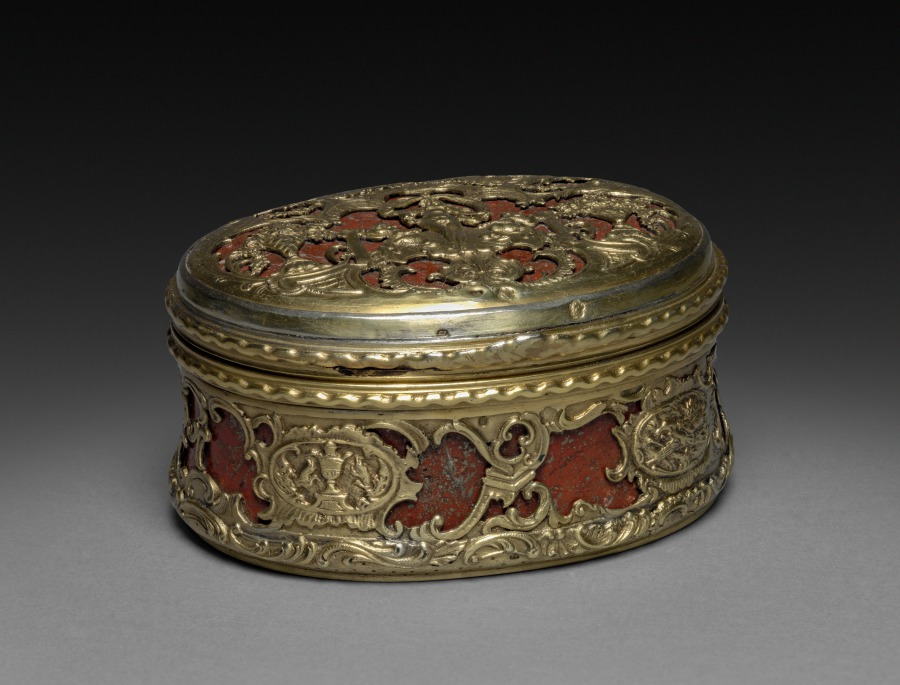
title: Box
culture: Austria, Vienna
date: late 1800s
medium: silver gilt and hardstone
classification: Metalwork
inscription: "3A"; head of Diana, Vienna marks in use since 1872. Maker's mark in an oval punch, first letter "B," second difficult to read, perhaps "P," mark for Bruder Pollak (Neuwirth, p. 116).